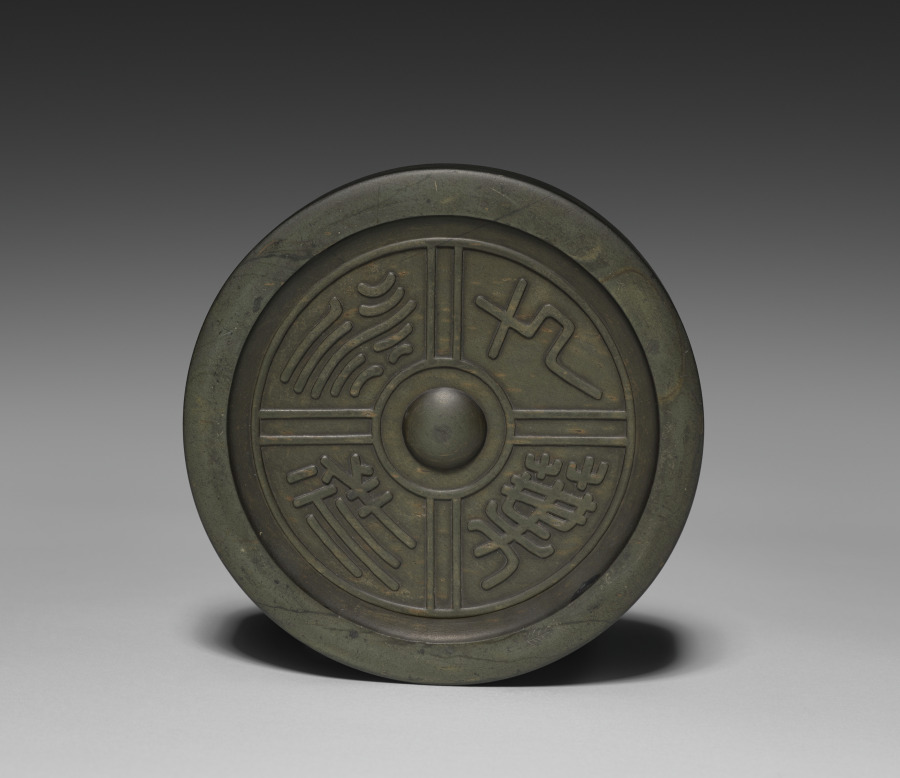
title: Inkstone in the Shape of a Roof Tile with Seal Script Characters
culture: China, Qing dynasty (1644–1911)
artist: Workshop of Jian Guzhai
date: 1700s–1800s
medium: She stone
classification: Stone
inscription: 七葉永祥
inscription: 「鑑古齋仿製」 「穎川春暉館文寶」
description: This inkstone is particularly noteworthy for its inscriptions in two styles. The base shows four characters in seal script (zhuanshu) expressing auspicious, or favorable wishes, while the characters on the side in standard script (kaishu) record the name of the workshop and that of the collector’s studio. Inkstones were used to grind solid ink cakes with the addition of water to produce liquid ink for brush painting and calligraphy.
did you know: The four large seal script characters on the base of this inkstone, 七葉永祥, may be read as "eternal good fortune for seven generations."